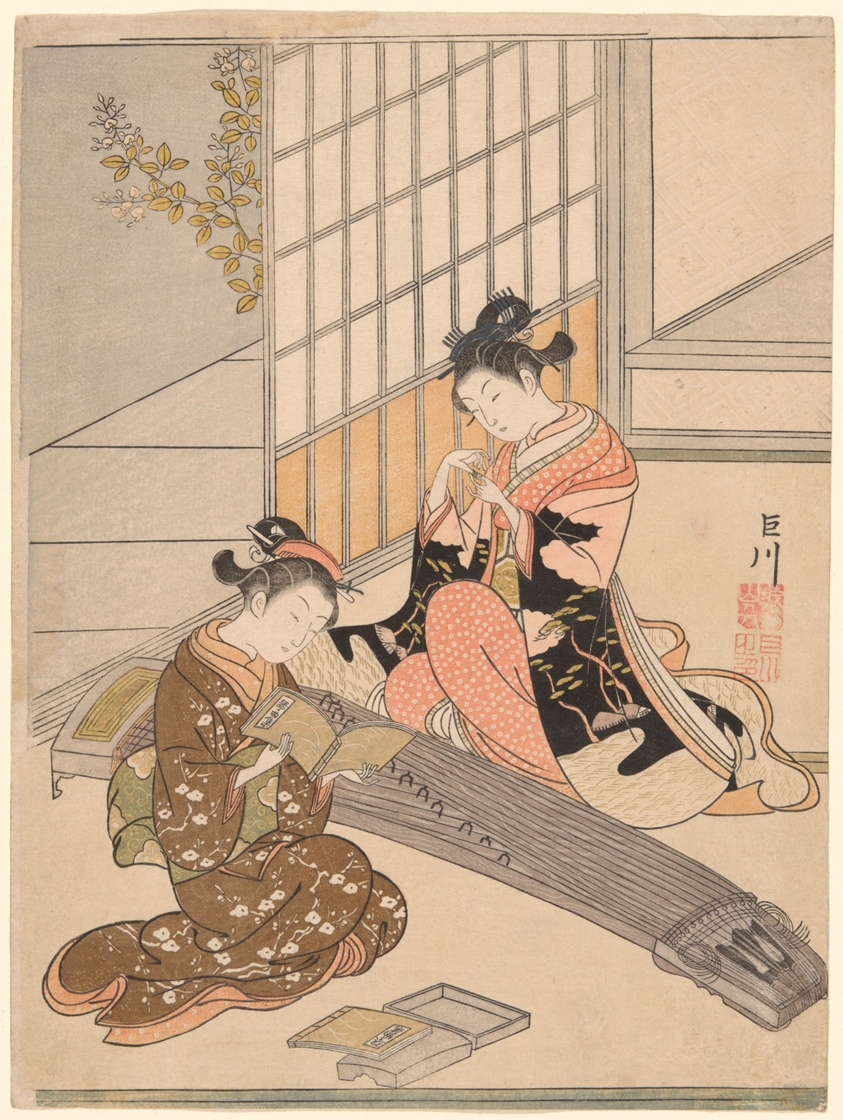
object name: Print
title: Descending Geese of the Koto Bridges (Kotoji no rakugan), from the series "Eight Views of the Parlor (Zashiki hakkei)"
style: Japanese (culture or style)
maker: Suzuki Harunobu 鈴木 春信; Japanese, 1725 (?)-1770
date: c. 1766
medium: Color woodblock print; chuban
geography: Japan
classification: woodblock print; print; asian art